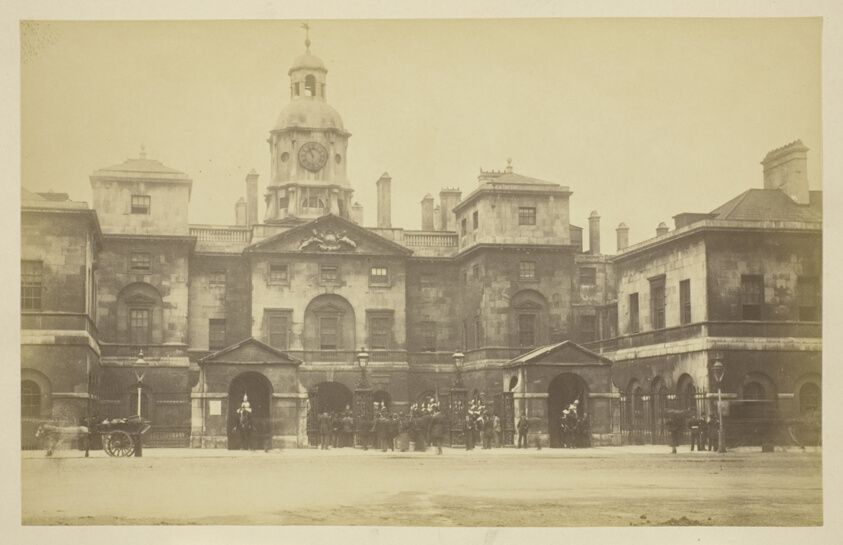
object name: Photograph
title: The Horse Guards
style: 19th century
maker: Artist unknown; probably English, 19th century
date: 1850–1900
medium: Albumen print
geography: England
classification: albumen silver print; photographic process; photography; photograph